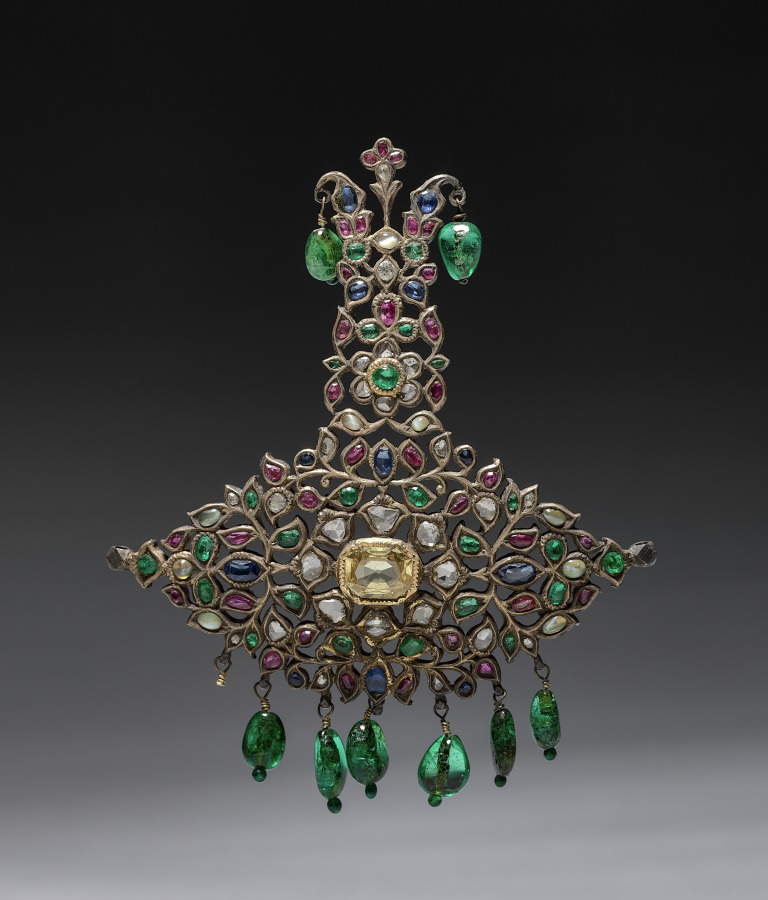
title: Turban Ornament (Sarpech)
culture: India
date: 1800s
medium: Gilt silver with diamonds, rubies, emeralds, topaz, blue sapphires, yellow sapphire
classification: Jewelry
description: This type of ornament would have been affixed to the front of a turban as an emblem of high noble status. The raised central element mimics the shape of an eagle feather or plume.